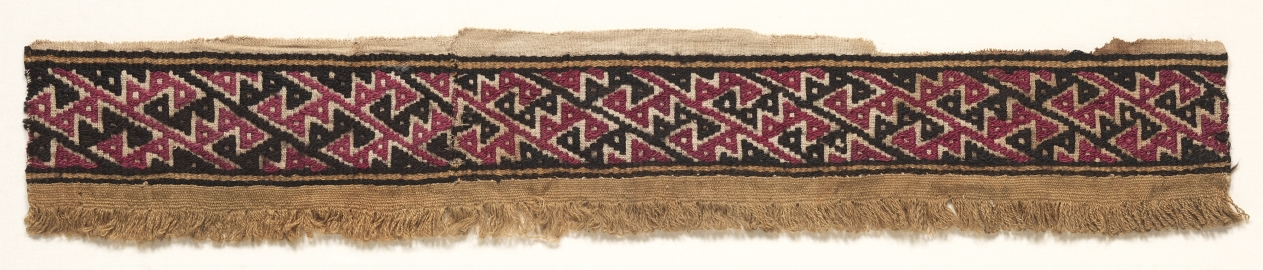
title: Border Strip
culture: Peru, Central Coast, Chancay, 12th-15th century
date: c. 1100–1400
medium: tabby weave with supplementary pattern weft; cotton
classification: Textile